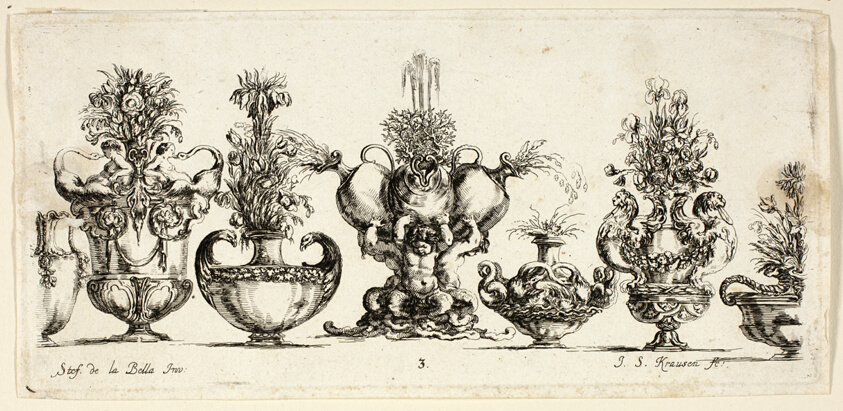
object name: Print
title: Plate Three from Raccolta di Vasi diversi di Stef. de la Bella Fiorentino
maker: Johanna Sibylla Küsel (German, active late 17th-early 18th century); after Stefano della Bella (Italian, 1610-1664)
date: 1646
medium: Etching on paper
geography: Germany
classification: etching; print; prints and drawing